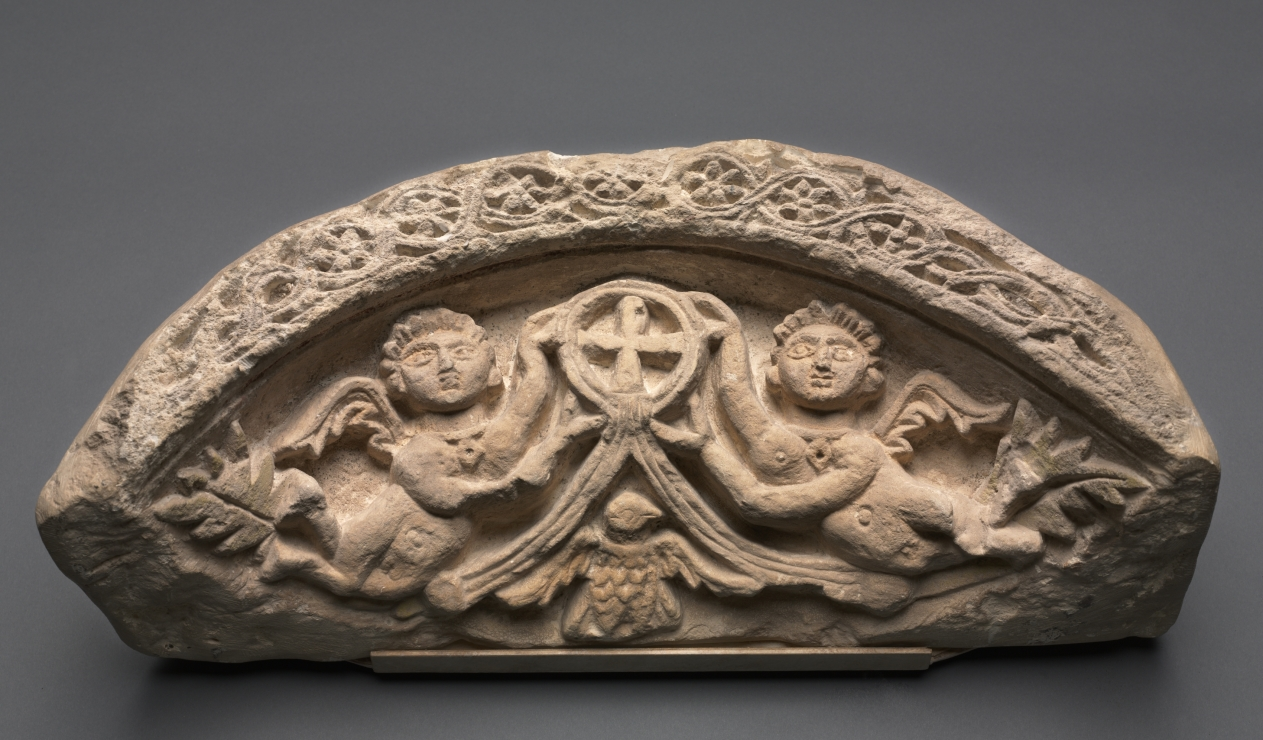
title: Lunette with Two Angels Supporting a Pendant Cross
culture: Egypt, Coptic period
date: 400s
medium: limestone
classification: Sculpture